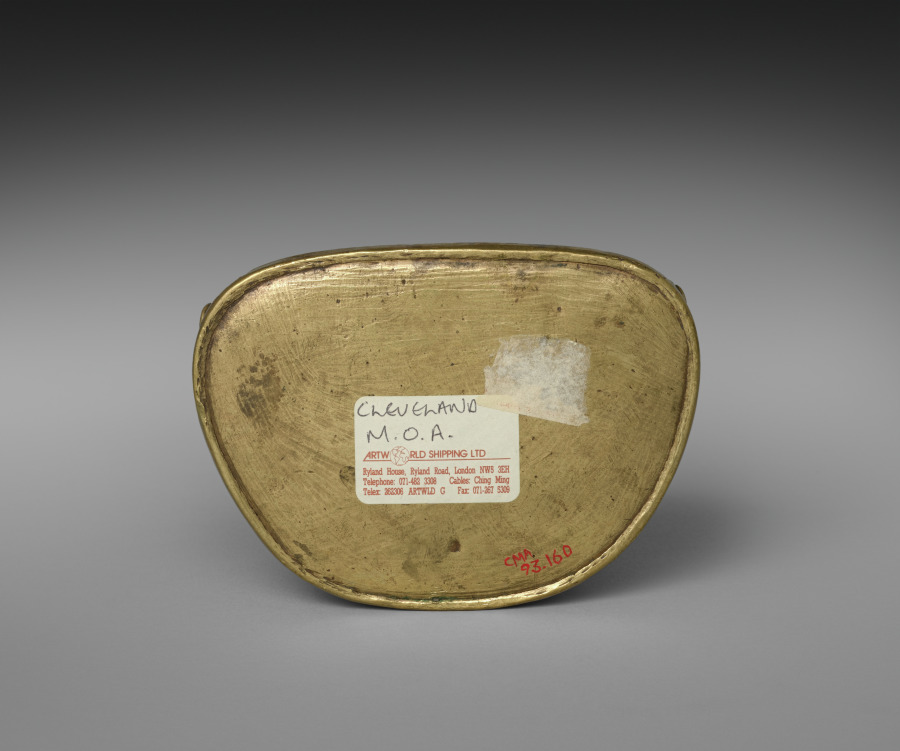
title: Portrait of Phagmo Drupa Dorje Gyalpo (1110–1170)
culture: Central Tibet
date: 1200s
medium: gilt bronze with gold, silver, copper, turquoise, lapis, and coral inlay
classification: Sculpture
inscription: / / Na mo 'ghu ru / / Ngan lam ban chung bdag gis ni / / bla ma Rin chen sku bzhengs pa yi / / bsod nams 'di yi byin brlabs kyis / / 'gro drug sdug sngal zad par shog / / Translation: "Salutations to the master ! May the sufferings of the six kinds of beings be appeased through the blessing of merit gained by me, the little monk of Ngan.lam, in having this statue of the Lama Rin.chen made."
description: This portrait statue depicts the first monastic leader of the prominent Buddhist monastery of Densatil, an influential early leader of the Tibetan Buddhist monastic order called Kagyu, famous for his views on the importance of meditation. He sits on a lotus pedestal and lion throne, like a Buddha, and his hand positions (mudras) communicate that meditation leads to enlightenment.